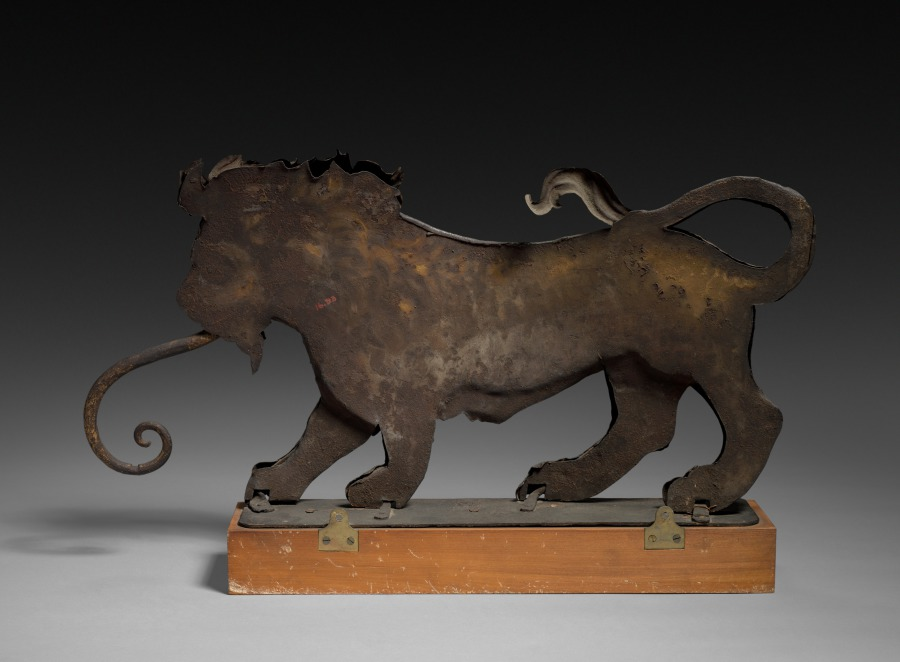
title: Lion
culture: Italy, 17th century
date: 1600s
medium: wrought iron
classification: Metalwork